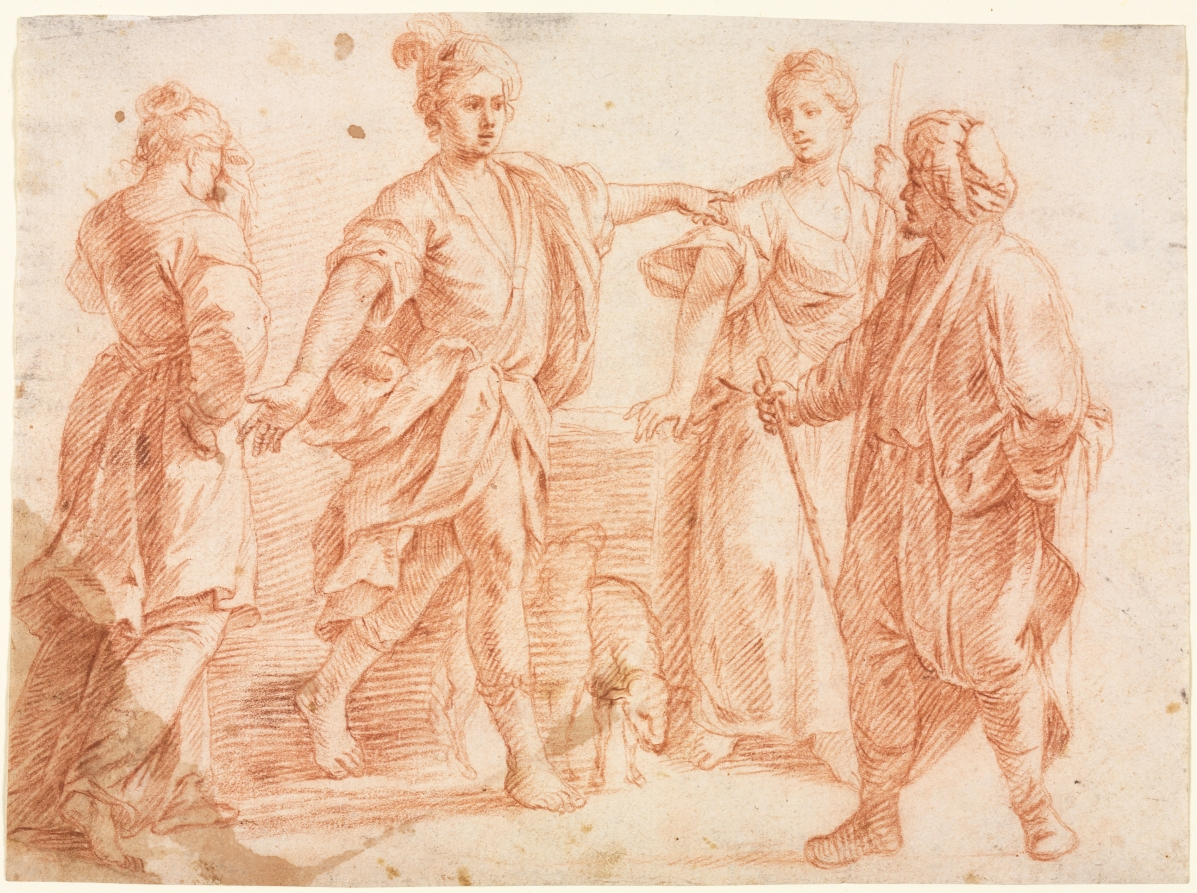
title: Jacob and Laban with Rachel and Leah (recto)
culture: Italy, Bologna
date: 1600s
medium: red chalk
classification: Drawing